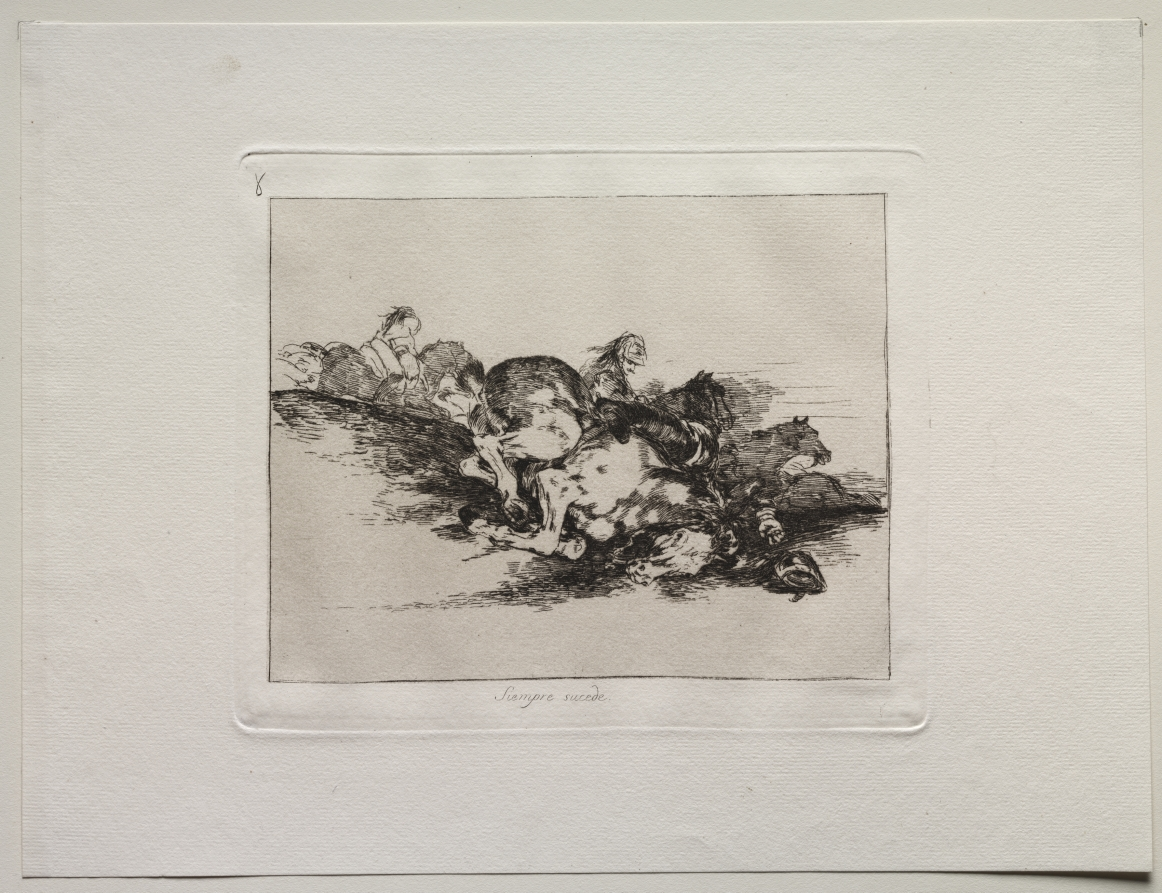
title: The Horrors of War: It Always Happens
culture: Spain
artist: Francisco de Goya (Spanish, 1746–1828)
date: c. 1810–20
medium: etching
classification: Print